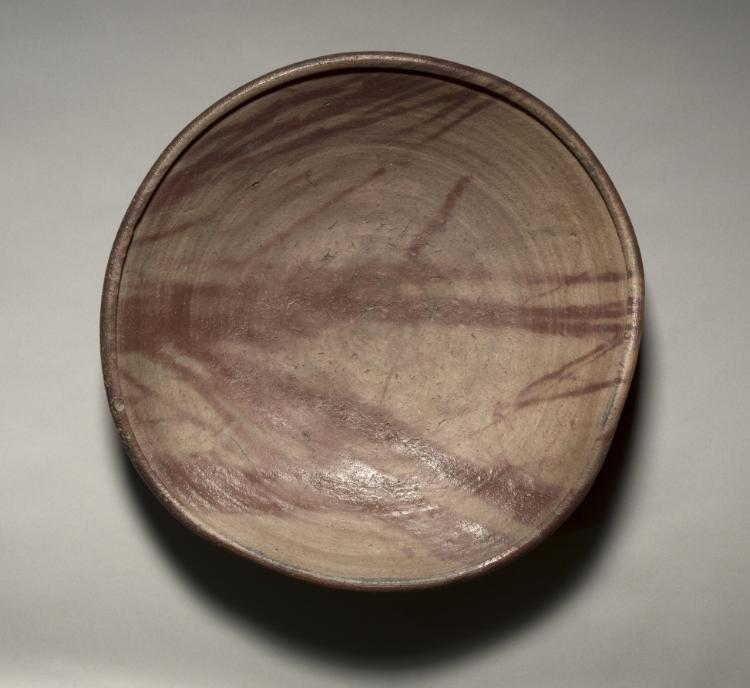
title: Plate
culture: Japan, Momoyama period (1573–1615)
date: late 1500s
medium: stoneware with natural glaze and hidasuki (fire-mark decoration) patterns (Bizen ware)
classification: Ceramic